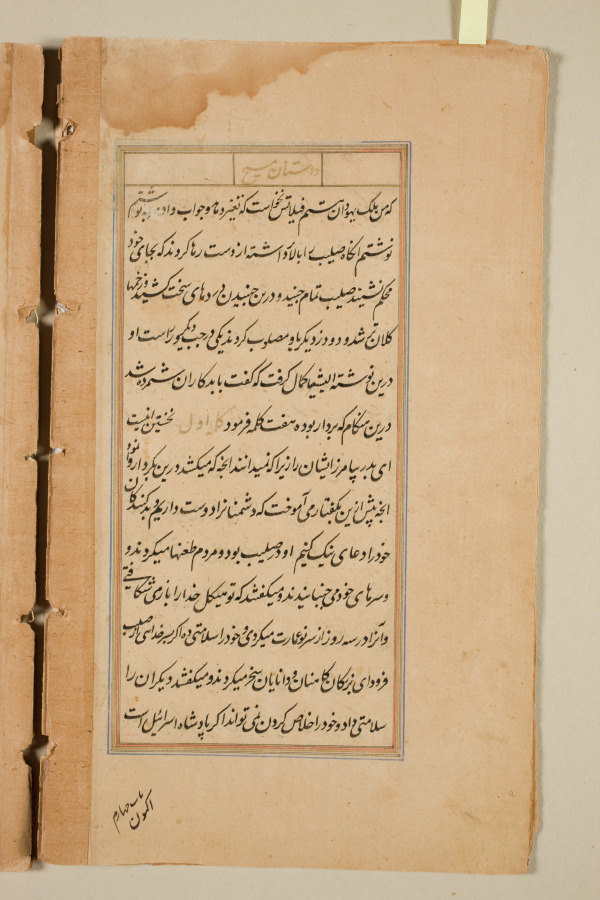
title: Text page from a Mirror of Holiness (Mir’at al-quds) of Father Jerome Xavier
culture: Mughal India, Allahabad, made for Prince Salim (1569–1627)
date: 1602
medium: Ink and gold on paper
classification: Manuscript